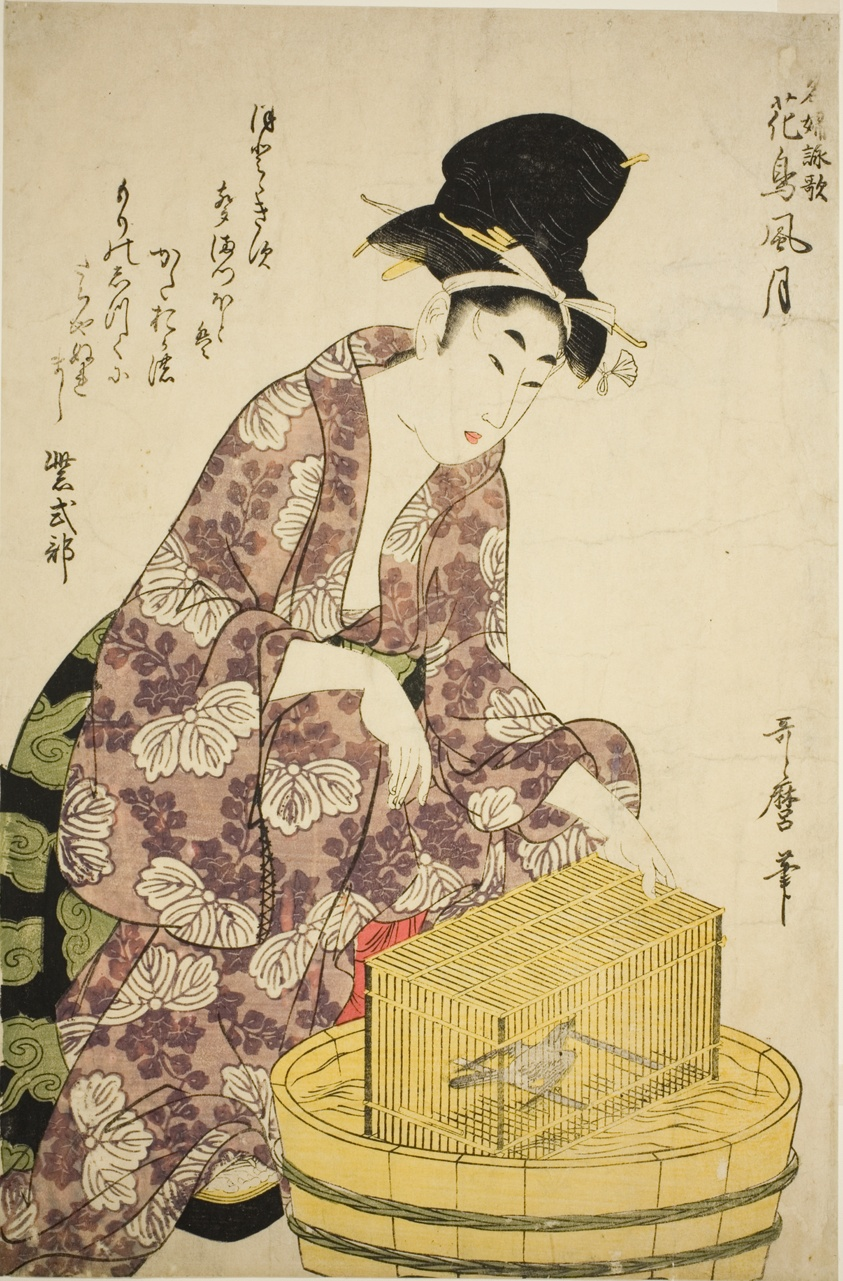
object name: Print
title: Murasaki Shikibu: Bird, from the series "Famous Women and Their Poems on Flowers, Birds, Wind, and Moon (Meifu eika kacho fugetsu)"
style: Japanese (culture or style)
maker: Kitagawa Utamaro 喜多川 歌麿; Japanese, 1753 (?)-1806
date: c. 1805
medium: Color woodblock print; oban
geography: Japan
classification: woodblock print; print; asian art